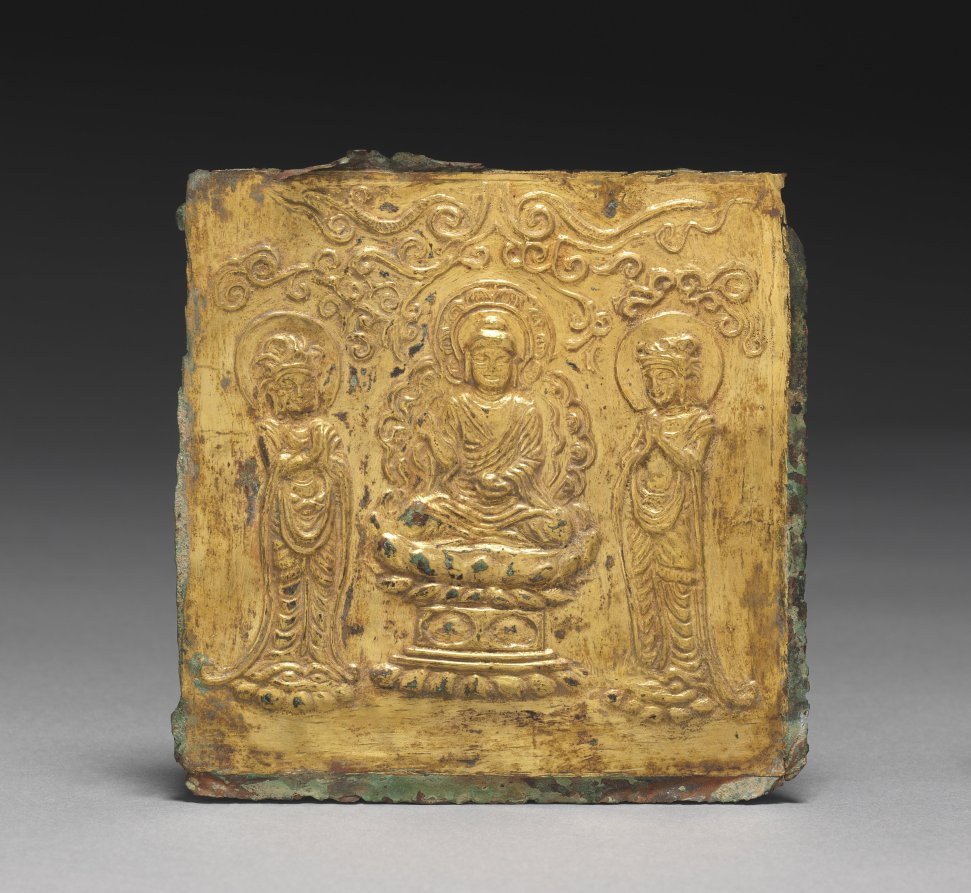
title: Plaque with the Image of Medicine Buddha Triad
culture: Korea, Unified Silla period (676-935)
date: 676–935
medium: embossed copper plate covered with gold leaf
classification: Metalwork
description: This plate features an embossed image of the Medicine Buddha flanked by two attendants. The Medicine Buddha, a doctor who cures aliments with Buddhist teachings, is usually represented holding a bowl of medicine in the palm of one hand.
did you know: The plate was created by hammering softly from the back of the metal sheet. This technique is called repoussé.